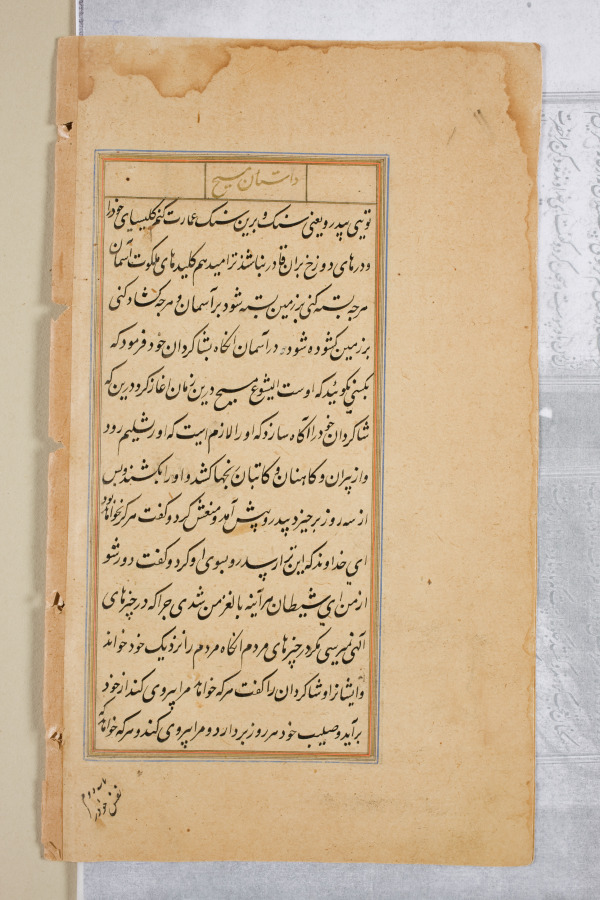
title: Text page from a Mirror of Holiness (Mir’at al-quds) of Father Jerome Xavier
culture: Mughal India, Allahabad, made for Prince Salim (1569–1627)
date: 1602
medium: Ink and gold on paper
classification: Manuscript